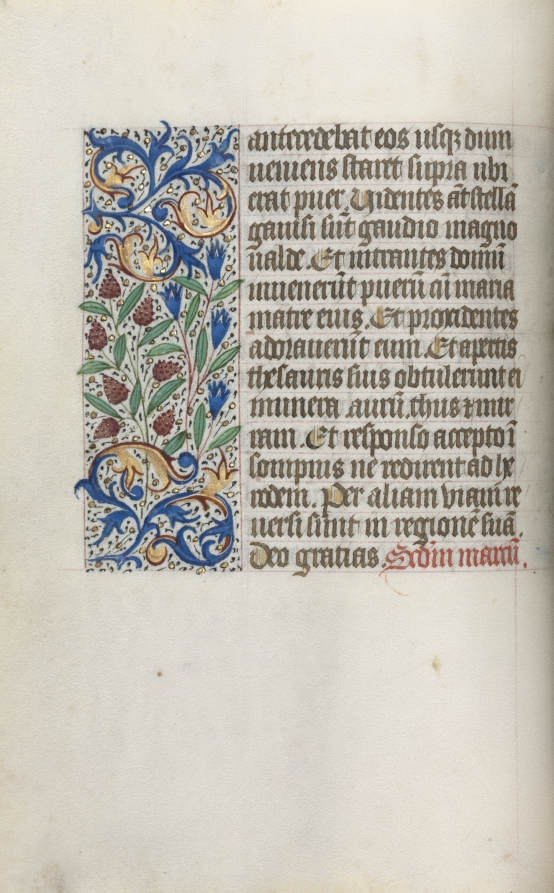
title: Book of Hours (Use of Rouen): fol. 17v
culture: France, Rouen, 15th century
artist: Master of the Geneva Latini (French, active Rouen, 1460–80)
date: c. 1470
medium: ink, tempera, and gold on vellum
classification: Bound Volume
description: In the late 1400s and early 1500s Rouen was an established and important center of book production. The city’s cathedral had a wealthy chapter that spent large sums of money to commission books and to maintain its extensive library. The stationers and booksellers would have likely been concentrated in or near the cathedral precinct. This artist, named after a manuscript now in Geneva, was Rouen’s principal illuminator during the second half of the 1400s.